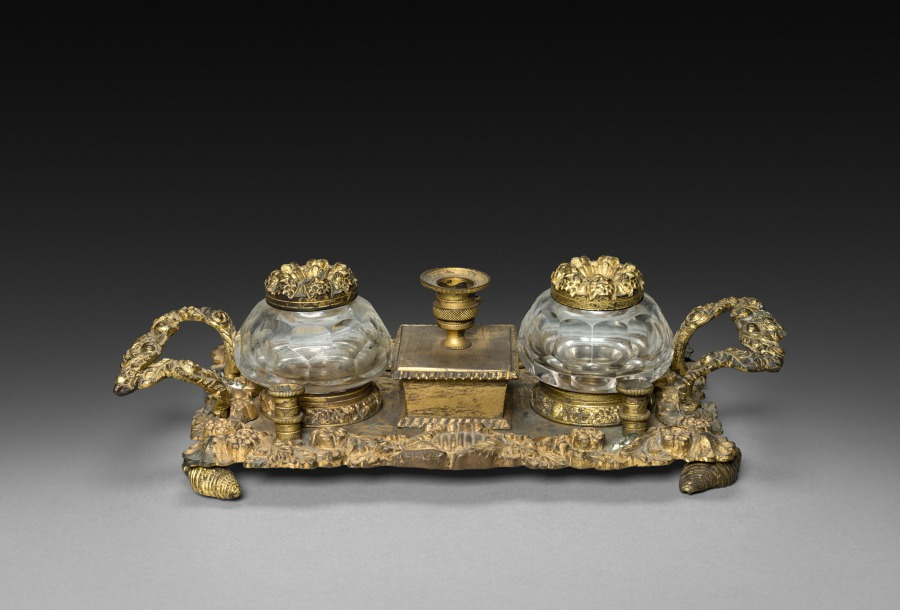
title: Inkwell Set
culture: England or America, 19th century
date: 1825–1850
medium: gilt bronze and glass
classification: Metalwork